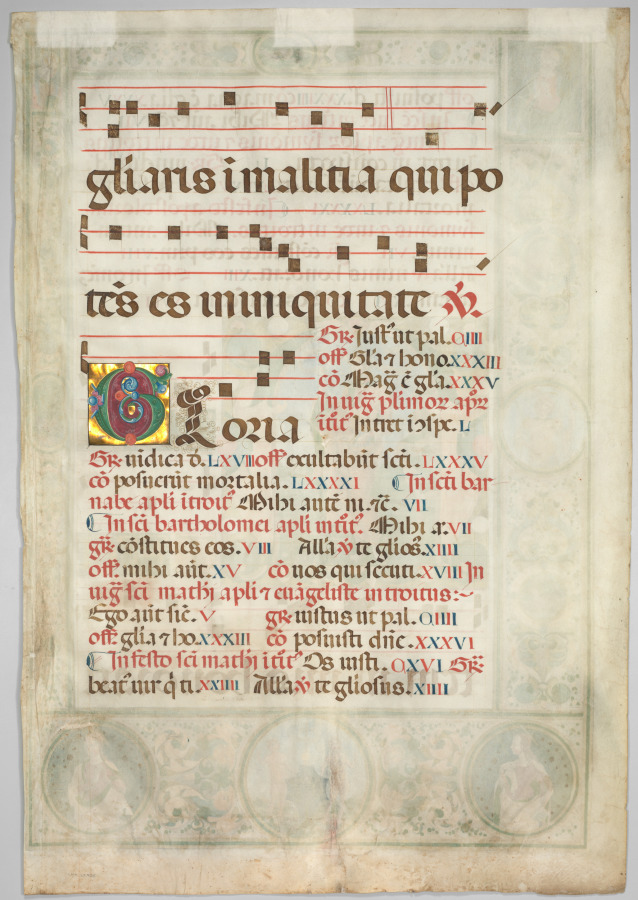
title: Leaf from a Gradual: Decorated Initial (verso)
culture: Italy, Ferrara, 15th century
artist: Jacopo Filippo d' Argenta (Italian, 1501)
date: c. 1480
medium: ink, tempera, and gold on parchment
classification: Manuscript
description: This leaf was excised from a volume of a large set of choral books known to have been commissioned by Bartolomeo delle Rovere for Ferrara Cathedral. Delle Rovere, nephew of Pope Sixtus IV, was the Bishop of Ferrara from 1474 to 1494 and his arms appear in the rondel at the bottom of the page-a shield bearing an oak tree (rovere in Italian) surmounted by a patriarchal cross, the symbol of his rank and authority. Payment records indicate that Argenta worked on the choir books for Ferrara Cathedral from 1478 to 1486. The initial M introduces the chant for the Introit (introduction) to the mass for the Feast of Saint Andrew, celebrated on November 30th. This date also marks the beginning of the Advent season (leading to Christmas) in the liturgical calendar.